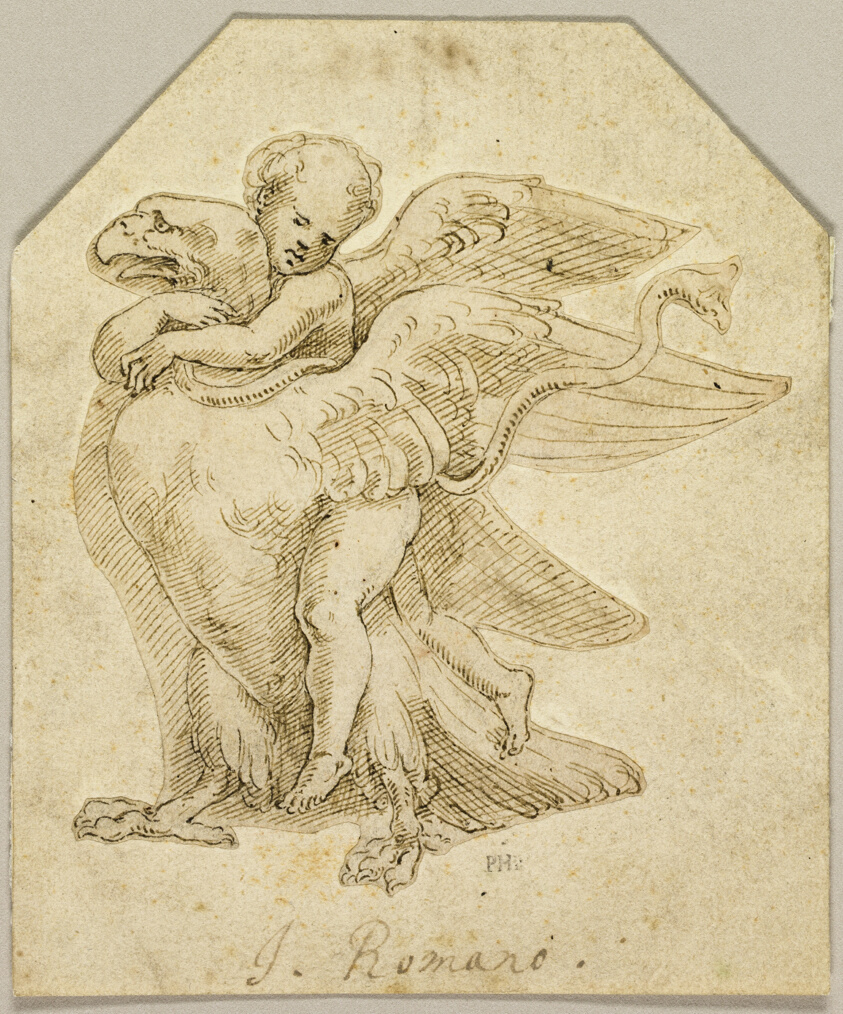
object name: Drawing and Watercolor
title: Cupid Astride an Eagle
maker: Giulio Pippi, called Giulio Romano, after; Italian, c. 1499-1546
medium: Pen and brown ink, with brush and brown wash, over traces of black chalk, on buff laid paper, laid down on cream laid paper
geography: Italy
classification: ink with wash; drawings (visual works); prints and drawing